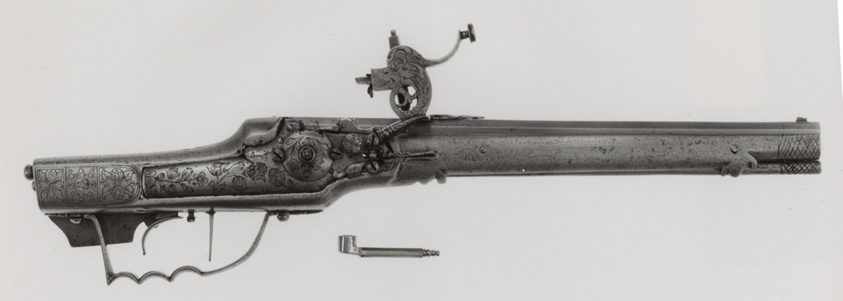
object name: Arms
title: Boy's Gun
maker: German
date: third quarter of 17th century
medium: Steel and brass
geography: Germany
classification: firearm-long gun; arms; arms and armor